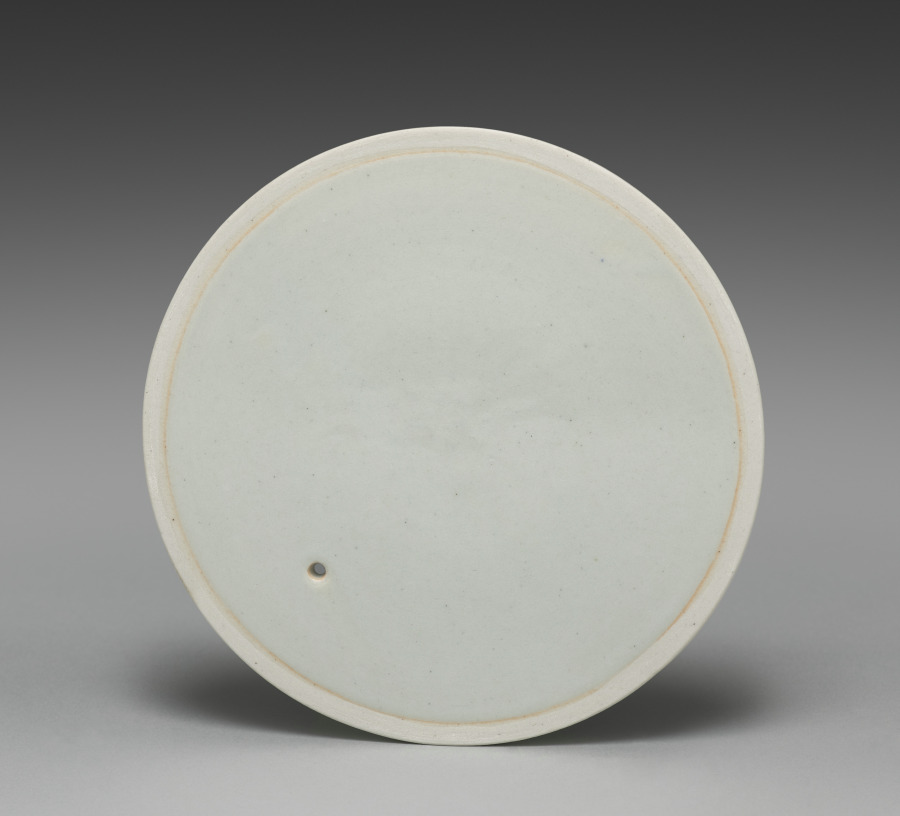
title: Lid for a Sake Pourer with Chrysanthemum, Orchid, and Plum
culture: Japan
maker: Seifū Yohei III (Japanese, 1851–1914)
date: c. 1887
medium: Porcelain with underglaze blue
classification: Ceramic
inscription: Artist's signature in underglaze blue on the base.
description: This sake pourers has a wide basin with a low foot; a generous spout open across the top half; a flat, round lid with a small knob recessed flush to the top of the container; and a tall, arched handle that meets the container where the top joins the basin at a sharp angle. It has a painting in underglaze blue of the Four Nobles: chrysanthemum, orchid, plum, and bamboo. Unlike the creamy white color of some Yohei III works, the white of this sake pourer has the bluish cast typical of porcelains produced in Kyoto. It is signed in underglaze blue on the base.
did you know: This sake pourer is decorated with the Chinese theme of the Four Nobles, in which the qualities of a good person are represented by plant.